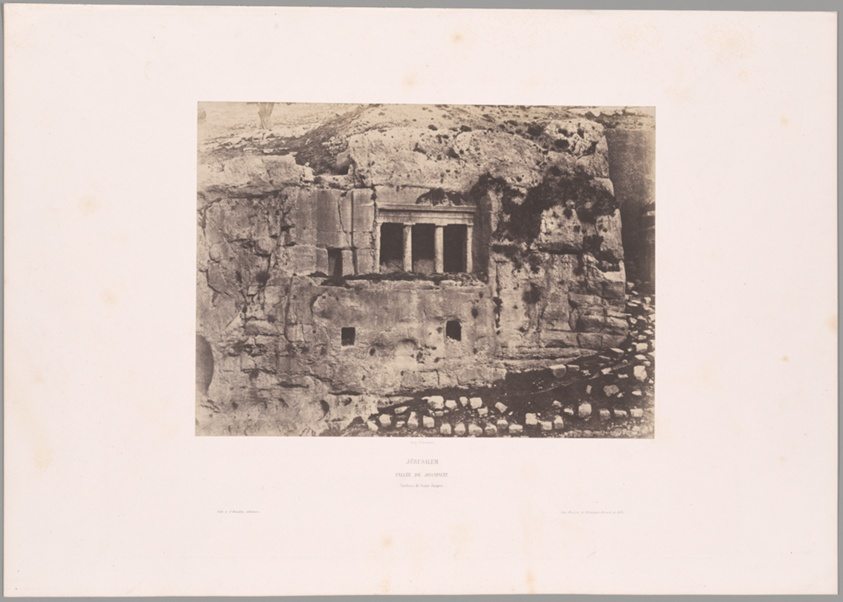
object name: Photograph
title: Jerusalem, Valley of Josaphat, Tomb of St. James (Jérusalem, Vallée de Josaphat, Tombeau de Saint Jacques)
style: 19th century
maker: Auguste Salzmann (French, 1824–1872)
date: 1854, printed 1856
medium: Salted paper print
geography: France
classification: salted paper print; photographic process; photography; photograph